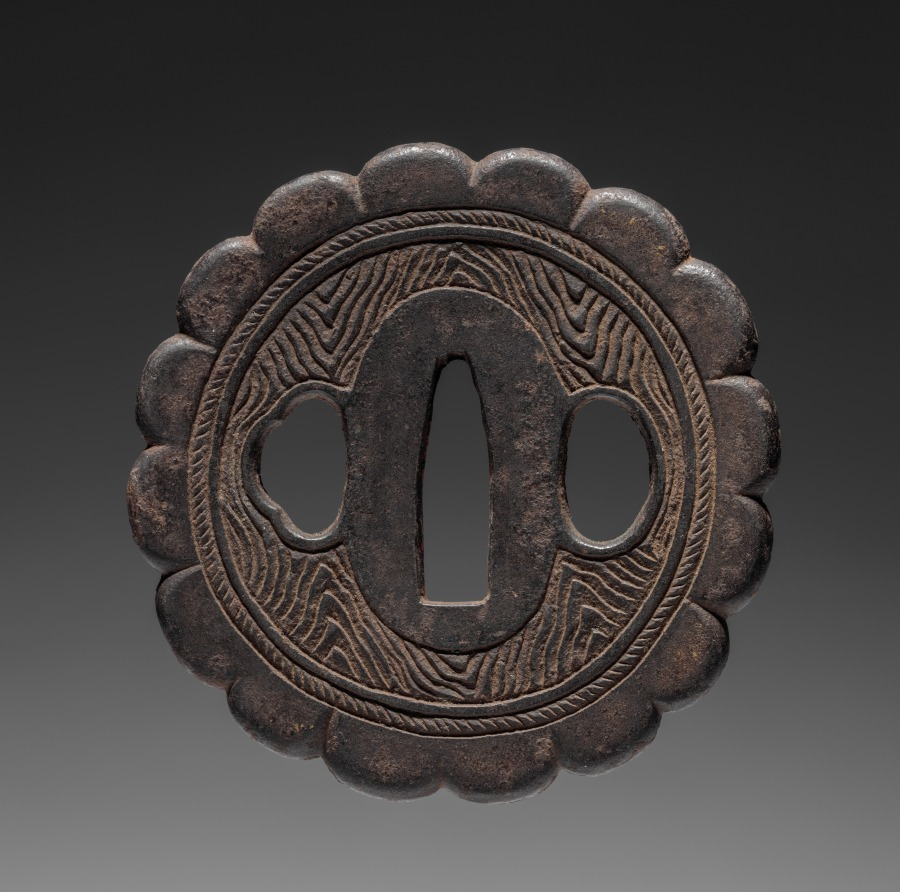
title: Sword Guard (Tsuba)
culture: Japan, possibly Edo period (1615-1868)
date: c. 1615–1868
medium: iron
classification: Arms and Armor